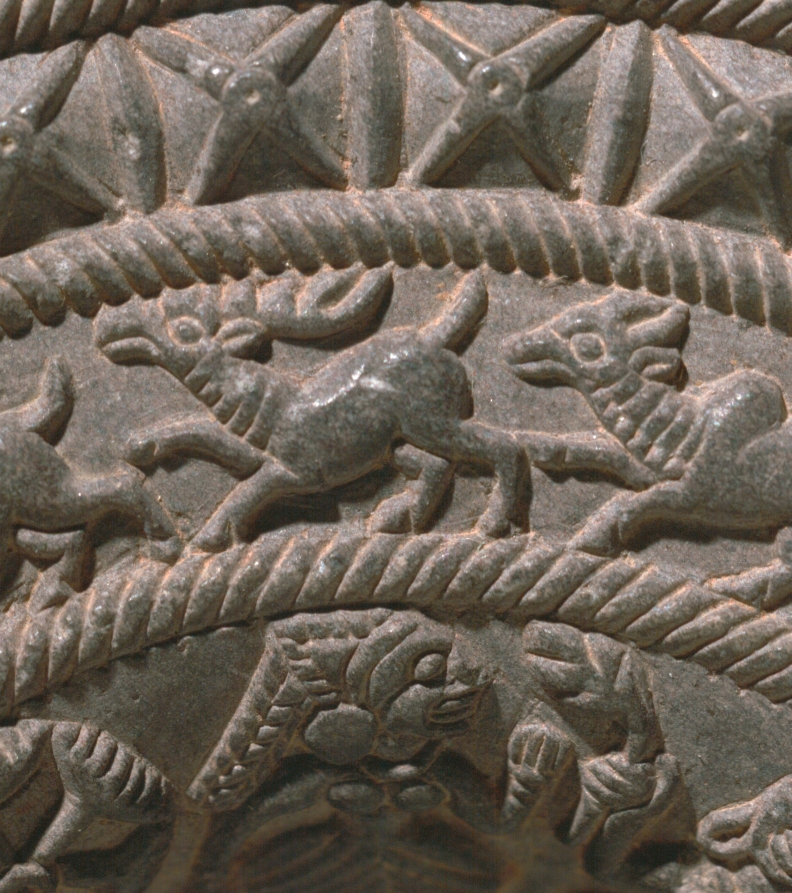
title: Ringstone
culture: India, Maurya period (322–185 BCE)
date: 200s BCE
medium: steatite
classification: Sculpture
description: Ringstones are among the earliest works of art to be created in stone during India's historical period. This example is finely carved with detailed images of affectionate couples and palm trees, running animals, and geometric motifs in concentric circles. The function of ringstones remains uncertain, since none of the surviving examples is inscribed or explained in a text.